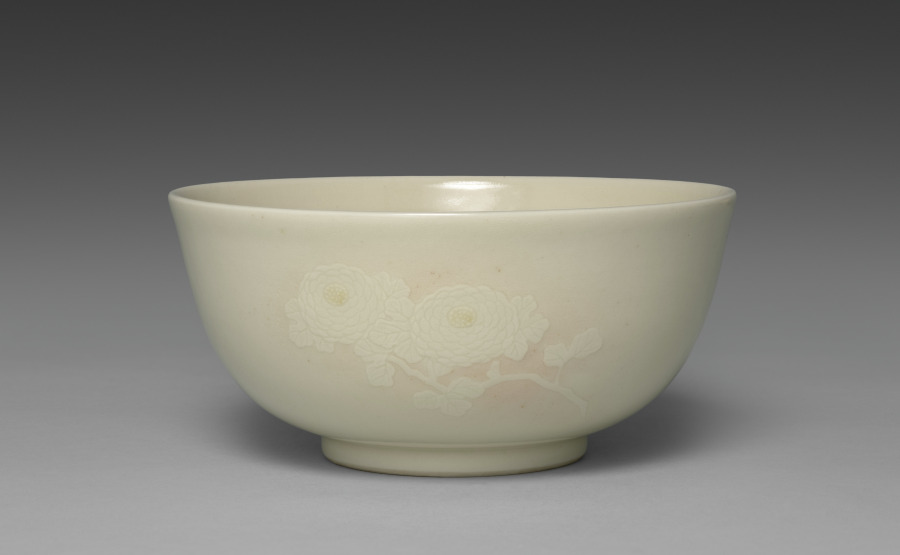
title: Sweets Bowl with Chrysanthemums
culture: Japan, Taishō period (1912–26) or Shōwa period (1926–89)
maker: Seifū Yohei IV (Japanese, 1872–1951)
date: 1914–46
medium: Porcelain with molded and carved design, underglaze color, and cream glaze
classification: Ceramic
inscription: 清風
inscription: 成山清風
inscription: 清風造 【印】 清風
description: Sweets bowls hold the confections enjoyed when drinking tea. This bowl and CMA 2022.206 offer an important lesson in appreciating Yohei IV’s ceramic practice. While they have the same design and shape and are made with the same materials, the execution of the pieces makes them entirely different after close inspection, thereby demonstrating the range of possible production results from a single template. Each bowl has the same composition of two different types of chrysanthemum flowers, one with long, slim, knifelike petals and the other with short, rounded, multilayered petals, shown running around its surface in low relief. The centers of the flowers are painted with yellow under the glaze. Yohei III formulated a number of new underglaze colors during his career, and this is likely one of them. For both bowls here, Yohei IV used his father’s kanpakuji formula, with underglaze pink for the gradated wash of color surrounding the flowers. The storage box lid provides abbreviated descriptions of the complex processes used in the surface decorations. It identifies the bowl as “Sweets dish with carved picture of chrysanthemum in kanpakuji.” The box has Yohei IV’s signature on the lid’s exterior, along with a seal reading “Seizan Seifu” 成山清風. The ink inscriptions are done in an elegant semiformal calligraphy. This bowl is more subtle and smooth in both the effect of the glaze and the execution of the relief. The designs are centered on the body between rim and foot. A closer look at the delineation of the flower petals reveals that the designs differ at times with respect to which petals appear in front or behind others. The centers of the bases of both bowls are incised with “Seifu” in a manner matching many other works by Yohei IV, although there are slight differences. As one might expect from the other differences in the bowls, the characters on the base of this subtle bowl are gentler, finishing in a tapering out of the strokes. Those on the bold bowl, CMA 2022.206, end in triangular pinheads.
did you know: This ivory and pink bowl by Seifū Yohei IV show his father’s “bright-jewel white porcelain” technique.